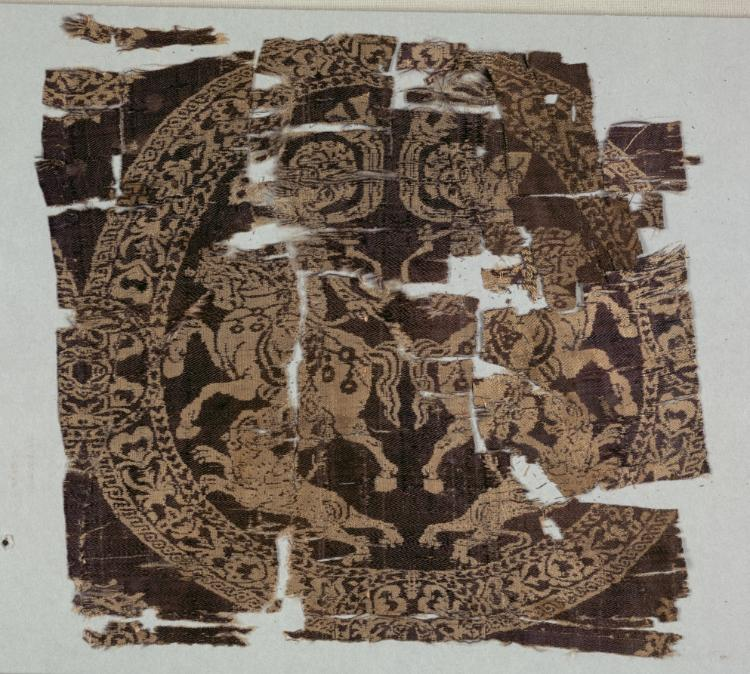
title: Roundel with Amazons, from a tunic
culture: Egypt or Syria(?)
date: 600s–800s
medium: samite: silk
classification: Textile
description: Within a roundel are a pair of mounted Amazons (women warriors) shooting backward at lions, which attack their running horses. The roundel frame is filled with stylized floral motifs and is bordered on the inside by a band of tiny hearts.